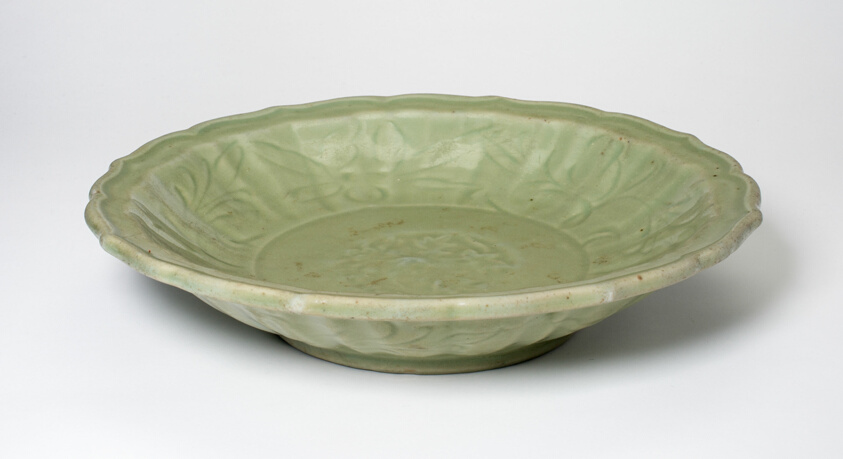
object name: Vessel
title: Dish with Flowers and Foliate Rim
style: Chinese (culture or style)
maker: China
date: Ming Dynasty (1368–1644)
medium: Celadon-glazed porcelain with underglaze molded decoration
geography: China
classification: dish (vessel); porcelain; asian art; ceramics; vessel